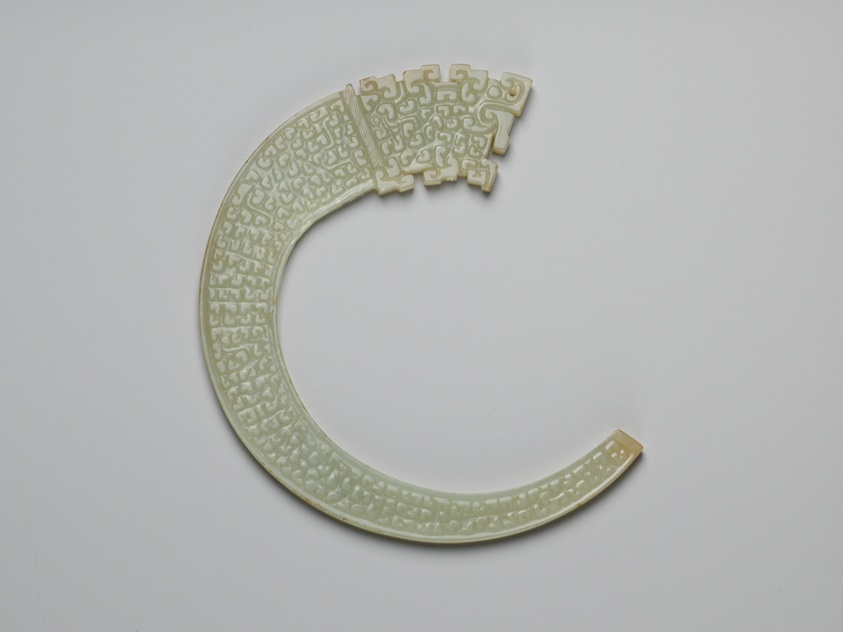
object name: Religious/Ritual Object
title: Dragon Pendant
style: Chinese (culture or style)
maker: China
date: Eastern Zhou dynasty ( c.770–256 B.C.), 6th century B.C.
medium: Jade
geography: China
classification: pendant (jewelry); jade; asian art; ritual objects